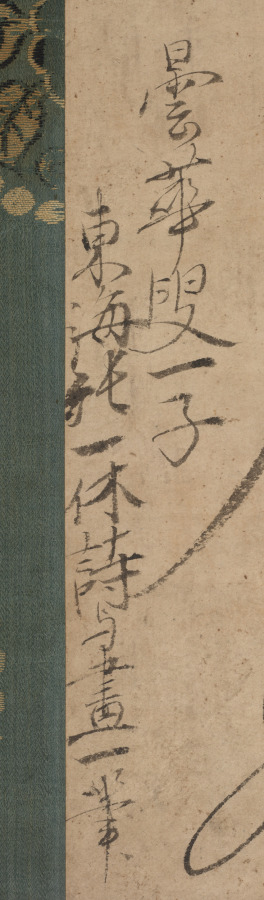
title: Calligraphy with Willow and Swallows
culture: Japan, Muromachi period (1392–1573)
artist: Ikkyū Sōjun (Japanese, 1394–1481)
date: 1400s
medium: hanging scroll, ink on paper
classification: Painting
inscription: How many days has it rid itself of the crow’s cloth? It knows not!/ Lovely is its body so nimble and neat./ Neither men of wealth, courtly position, or power can come close to the unfettered, noble swallow!/ With the coming of spring, it seems to be flying about, dancing around the grass hut of the foolish Priest. signed: Unkasō Isshi Tōkai jun Ikkyū shi ga ippitsu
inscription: outer box inscribed: Ikkyū Ōshō Enshi-zu Jigasan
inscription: inner box side lid inscribed: Showa 50 (1975), November by Tayama Honan with kao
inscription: Inner box side lid inscribed: Ikkyū Ōshō Bokuseki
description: The famed Buddhist monk Ikkyū is best remembered for his calligraphy. Calligraphic conventions of his time called for brushwork that did not vary much in style from character to character. However, as Ikkyū’s lines progress, his brushwork wanders between standard script and a sort of shorthand, marked by an uneven distribution of ink and a reduction of the characters to only the most necessary strokes. Ikkyū’s direct communication of emotion via brushwork became characteristic of the works produced by monks affiliated with the temple Daitokuji later in the Edo period (1615–1868).